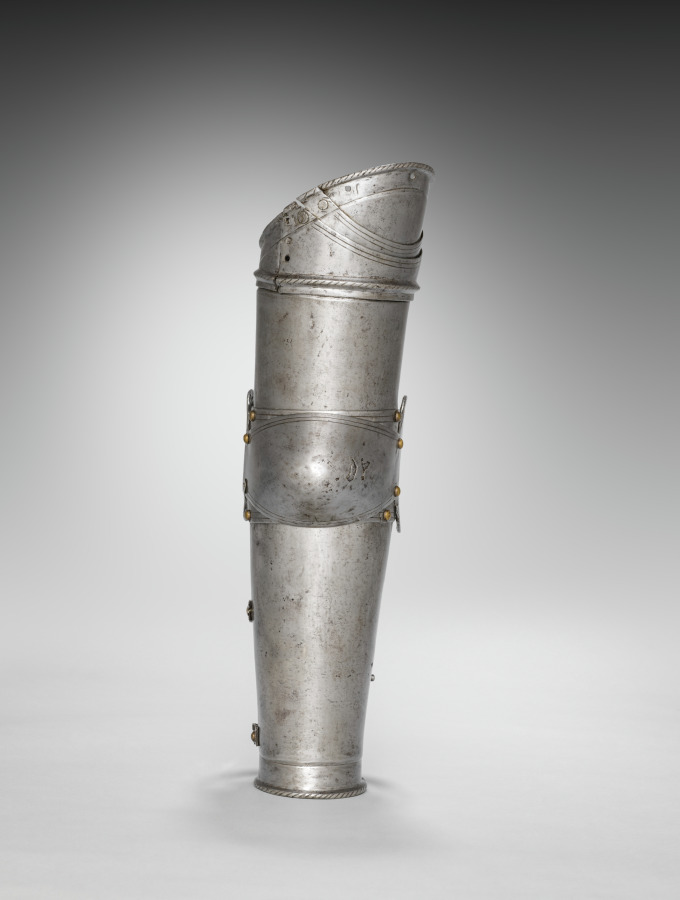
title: Proper Right Arm (Vambrace, Rerebrace and Couter)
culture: South Germany, 16th century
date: c. 1560–80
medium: steel, leather straps, brass rivets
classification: Arms and Armor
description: This armor was developed for the joust--a sporting combat between two mounted contestants. Although all of the elements of this armor date from the same period, they are not all from the same suit. This armor is thus called "composed." It also shows the asymmetry of jousting armor. The participants rode along a wall-like barrier known as a "tilt" with their left sides facing one another. Consequently, armor on that side of the body had to be thicker. Note the large plate (grandguard) over the left shoulder for extra protection. Also, the breathing holes in the helmet were placed on the right side (farthest from an opponent's lance) to avoid injuries from splinters. The bracket attached to the right breastplate is called the lance-rest, a shock-absorbing support designed to accommodate the lance when "couched" under the right armpit.